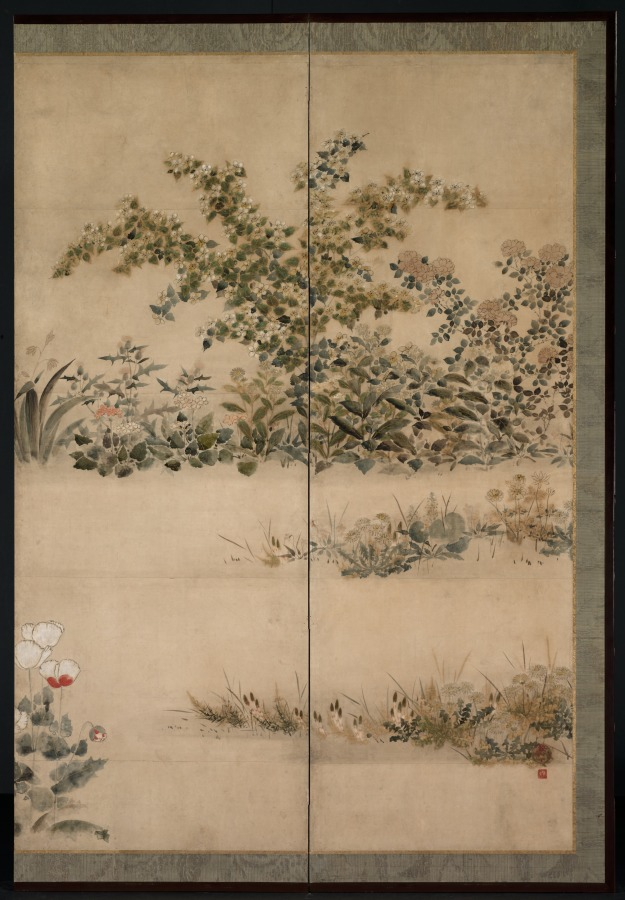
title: Flowers and Grasses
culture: Japan, Edo period (1615–1868)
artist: Kitagawa Sōsetsu (Japanese, active 1639–50)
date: mid-1600s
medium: One of a pair of six-panel folding screens; ink and color on paper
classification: Painting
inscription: two seals, lower right: "I-nen; Sosetsu"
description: Kitagawa Sōsetsu painted for the Maeda family, powerful rulers of what is present-day Ishikawa Prefecture on the central northern coast of Honshū, Japan’s main island. Screens served as room dividers and backdrops in Maeda grand residences. This composition is considered one of the artist’s masterpieces. Kitagawa Sōsetsu is thought to have been a student of Tawaraya Sōsetsu, who was in turn the student of Tawaraya Sōtatsu, the Kyoto-based master painter regarded as the creator of the style that came to be known as Rinpa. By selecting a painter of this lineage, the Maeda family consciously connected their aesthetics to those of the imperial capital as a means of proclaiming their elevated status.